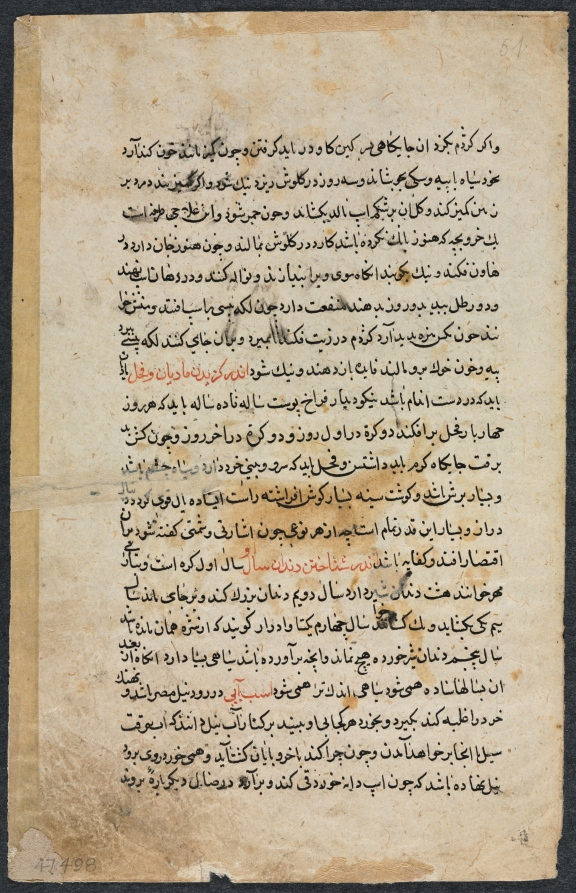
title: Text Page, Persian Prose (recto) from Nuzhat Nama-yi Ala'i (Excellent Book of Counsel) of Shah Mardan Ibn Abi al-Khayr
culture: Iran, Timurid Period, 15th century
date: 1400s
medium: ink and opaque watercolor on paper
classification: Manuscript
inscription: script: Naskh